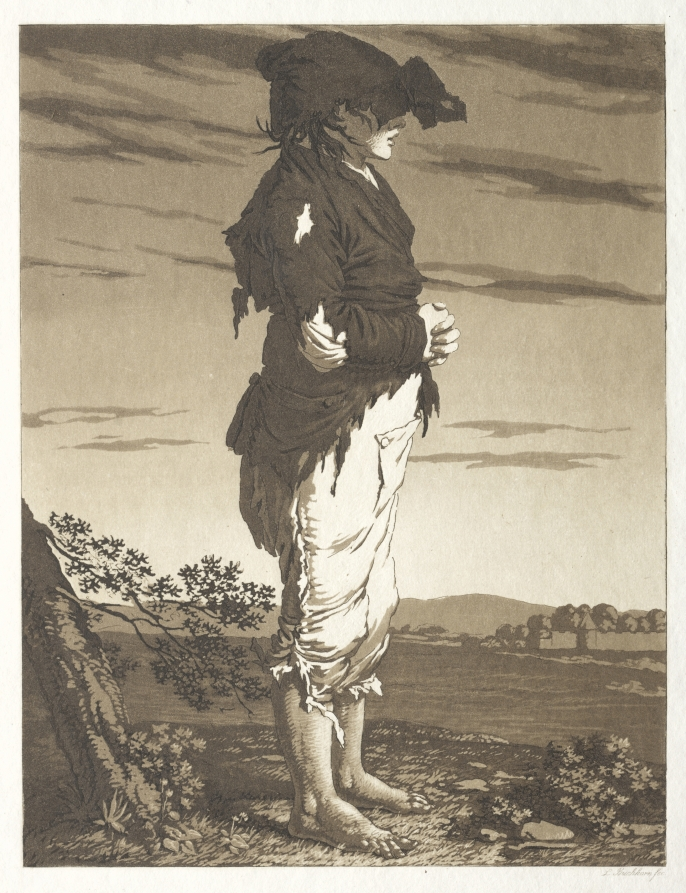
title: The Young Beggars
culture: Germany, late 18th-early 19th century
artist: Karl Ludwig Bernhard Buchhorn (German, 1770–1856)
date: c. 1800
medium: aquatint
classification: Print